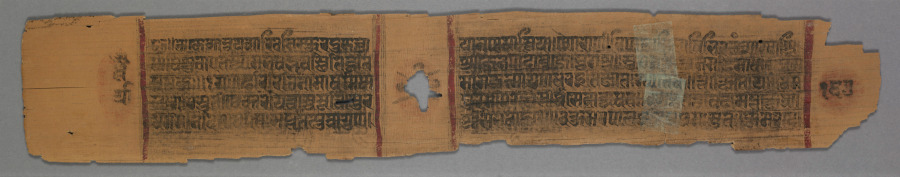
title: Genealogical text, folio 167 (verso) from a Kalpa-sutra and Story of Kalakacharya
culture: Western India, Gujarat, Palanpur (Prahladanapura)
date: 1278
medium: Gum tempera and ink on palm leaf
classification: Painting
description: This page provides the genealogy of the donor, who is from the Shaurani branch of the Ukesa family, which was prominent in Gujarat. Jain manuscripts of the Kalpa-sutra and Story of Kalaka often conclude with a colophon that states when and where the manuscript was made, as is found on the recto of this folio. The genealogy of the donor's family, on the verso, follows the colophon. There may have been one more page after this one containing the remainder of the genealogy.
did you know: The lamp black ink for the text was made from mixing carbon, water, and gum Arabic in copper pots.